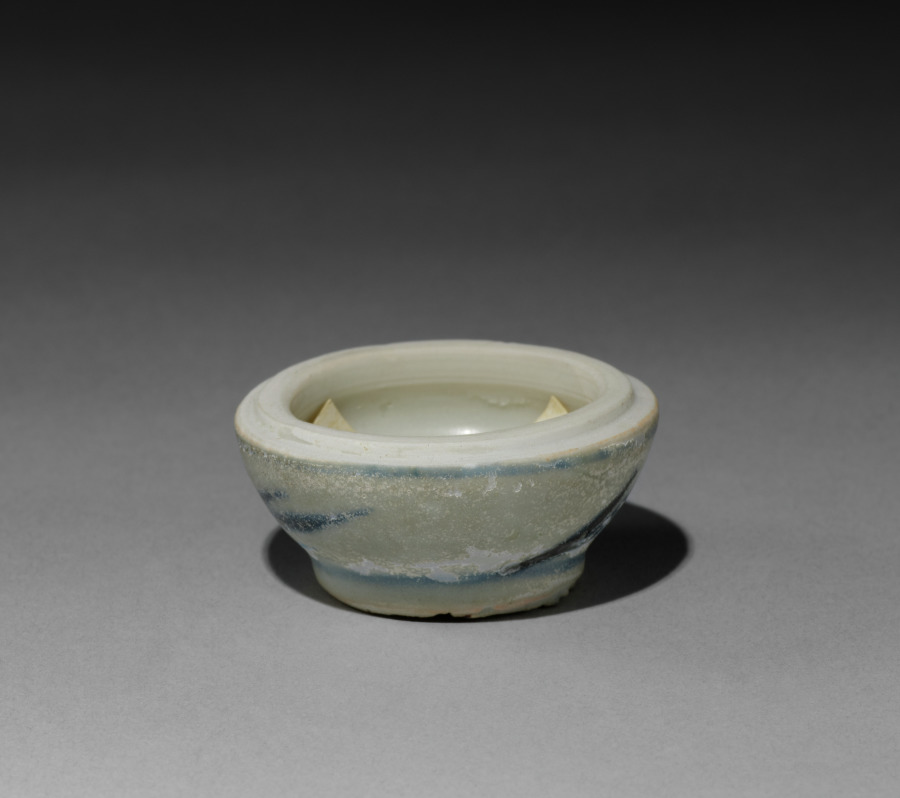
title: Pill Box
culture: China, Qing dynasty (1644-1911)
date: c. 1752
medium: porcelain with blue and white decoration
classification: Ceramic